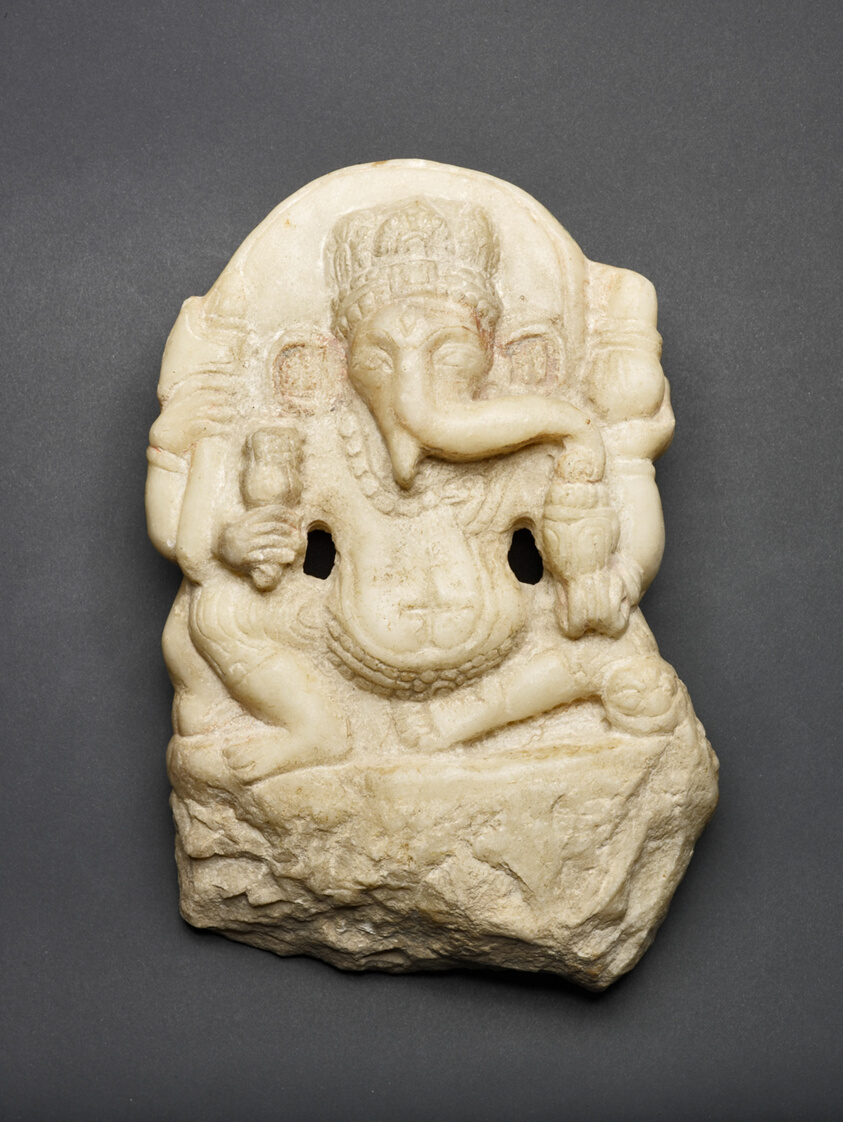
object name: Sculpture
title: Four-Armed Seated God Ganesha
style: South Asian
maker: Pakistan or Afghanistan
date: Shahi period, 7th/8th century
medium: Marble with traces of pigment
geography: Afghanistan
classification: sculpture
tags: Ganesha, gods (deities), religion